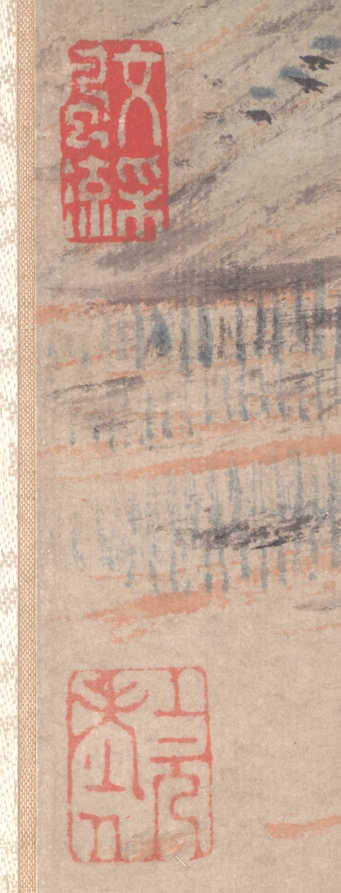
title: Listening to the Sound of Autumn in a Misty Grove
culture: China, Qing dynasty (1644-1911)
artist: Zhang Feng (Chinese, active c. 1632–1662)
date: 1657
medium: Hanging scroll; ink and color on paper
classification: Painting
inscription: Artist's inscription, signature, and 2 seals: Frosty colors have just appeared throughout the countryside,/ Autumn sounds echo unexpectedly through the trees./ The distant mountains cannot be seen,/ As the evening mist spreads, thicker and deeper./ Casually painted at the bamboo window on the solstice day of the dingyou year [1657]. Zhang Feng. [seal] Feng. [seal, lower left corner] Shangyuan Laoren. (Translation by LYSL/HK/WKH)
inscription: 3 additional seals: 1 of Fa Liang (Qing Dynasty); 2 unidentified.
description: Zhang Feng from Nanjing passed the local government examinations shortly before the fall of the Ming dynasty. With the Manchu conquest, he joined the ranks of loyalists who refused to serve the new regime. He chose the intermittently frugal life of a Buddhist adept. Many of his paintings lament the loss of the empire. In this scroll, he depicts a lone figure in a stark landscape of frosty atmosphere enshrouded in mists. Close looking reveals red strokes that color the grounds, a way of expressing his loyalty to the Ming whose family name Zhu means red.